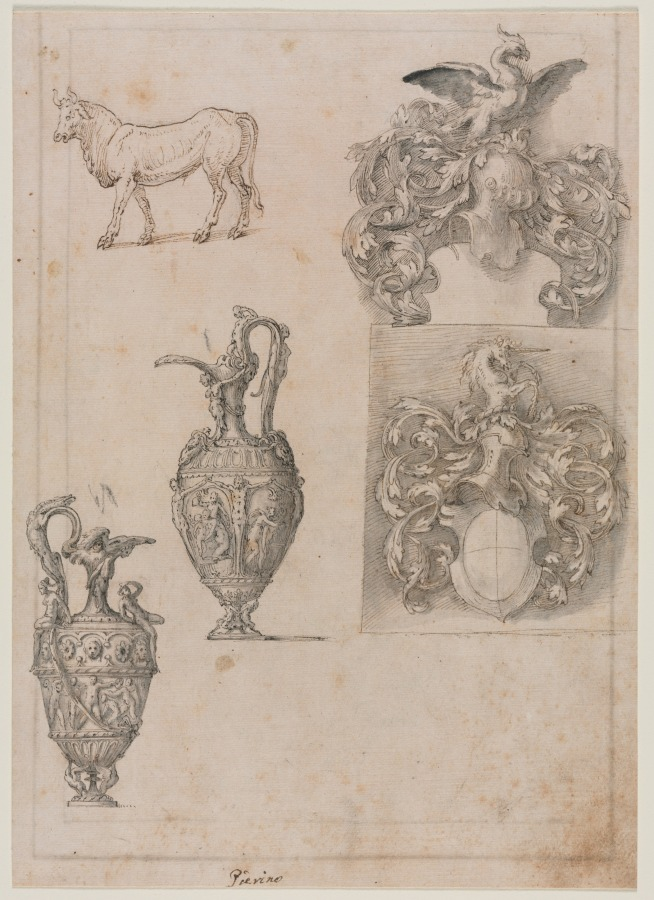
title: Design for Two Vases, Two Coats of Arms, and a Bull (recto)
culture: Italy, 16th century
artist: Luzio Romano (Italian, active 1528–75)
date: mid 1500s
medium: pen and brown ink and brush and gray and brown wash over black chalk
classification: Drawing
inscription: lower center, in brown ink: Pierino ; VERSO OF SECONDARY SUPPORT, lower right, in graphite: A3103